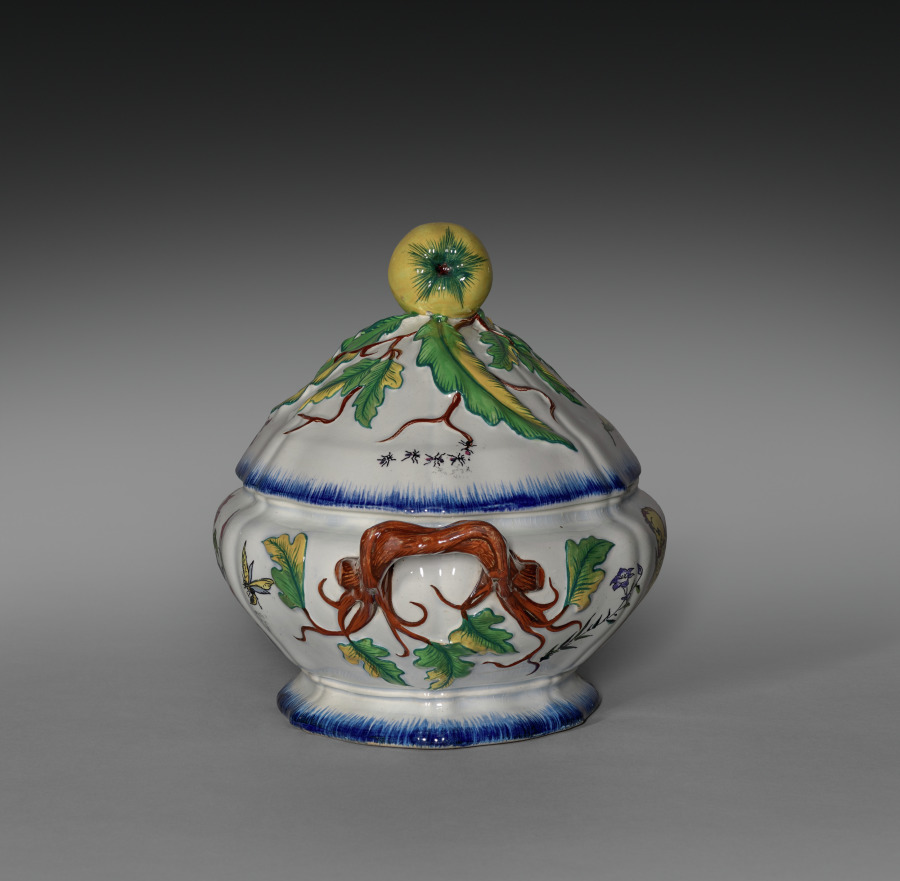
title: Covered Tureen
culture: France, Creil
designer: Félix Bracquemond (French, 1833–1914)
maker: Creil Factory (French)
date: 1866–75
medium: porcelain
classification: Ceramic